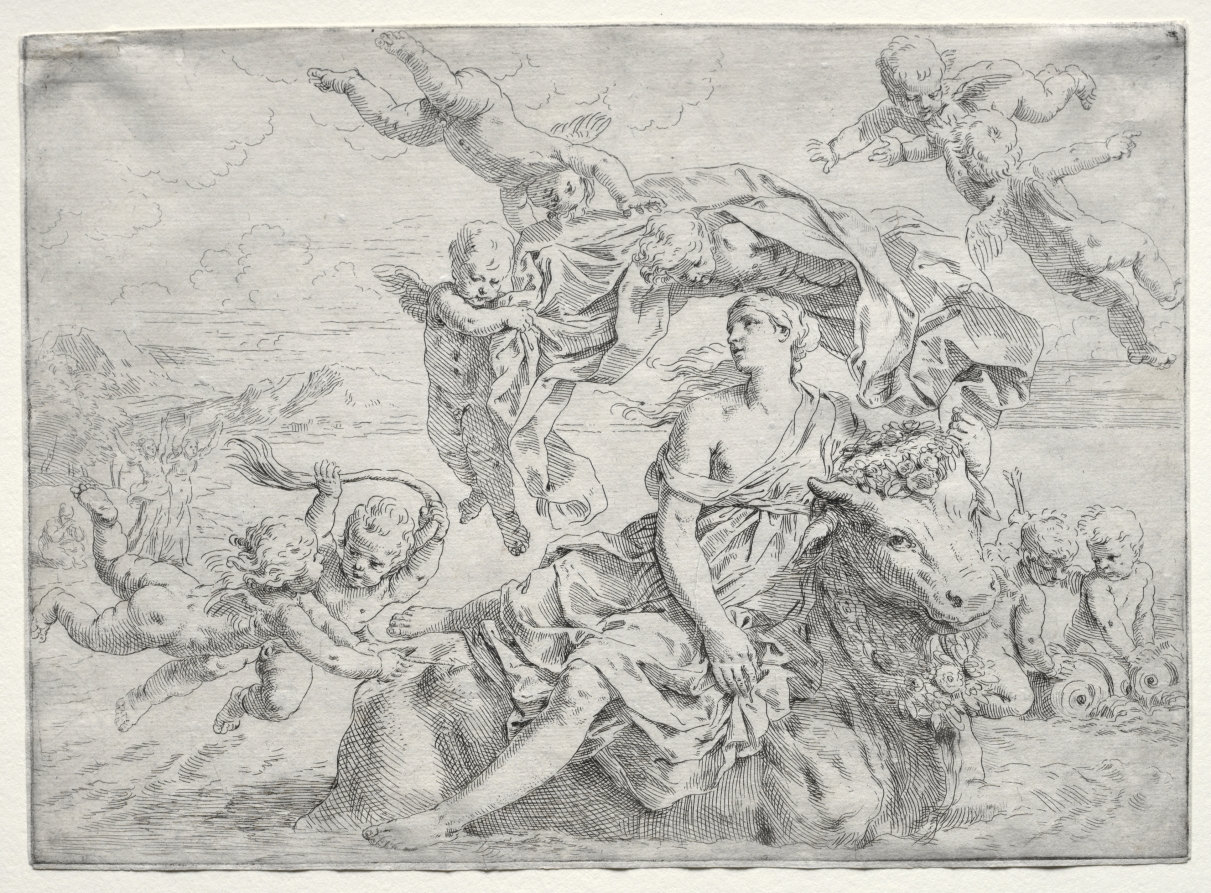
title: Rape of Europa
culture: Italy, 17th century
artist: Simone Cantarini (Italian, 1612–1648)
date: 1632–48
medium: etching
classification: Print